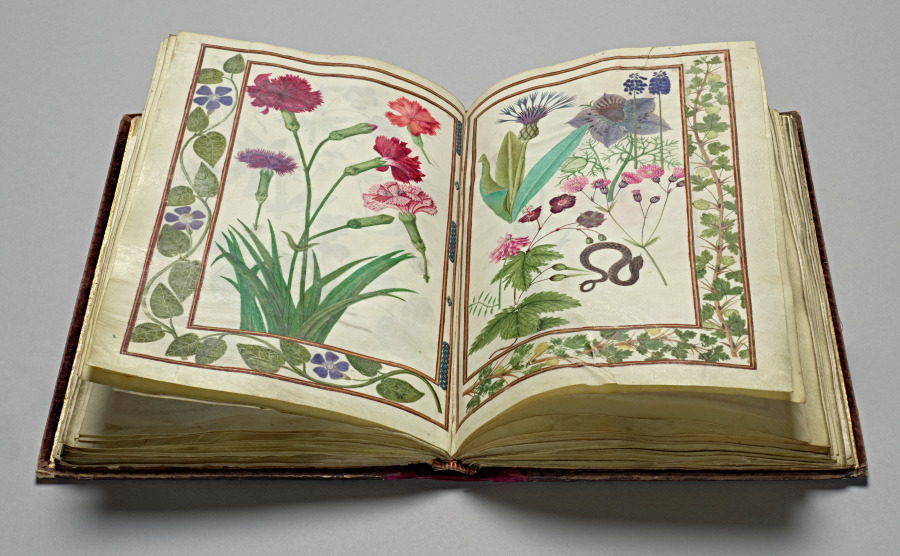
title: Florilegium (A Book of Flower Studies)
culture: France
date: 1608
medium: bound manuscript of 48 leaves, 77 drawings; watercolor, ink, silver, and gold over occasional traces of pencil, on vellum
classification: Bound Volume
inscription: Dated: Poitiers 1608 (on frontispiece) Signed: On frontispiece in black ink, lower right: Van Kuyk Notation on drawing: Frontispiece: in pencil, lower margin: * élève de Van Kessel, peintre flammand (* in pencil also appears in front of Van Kuyk's name).